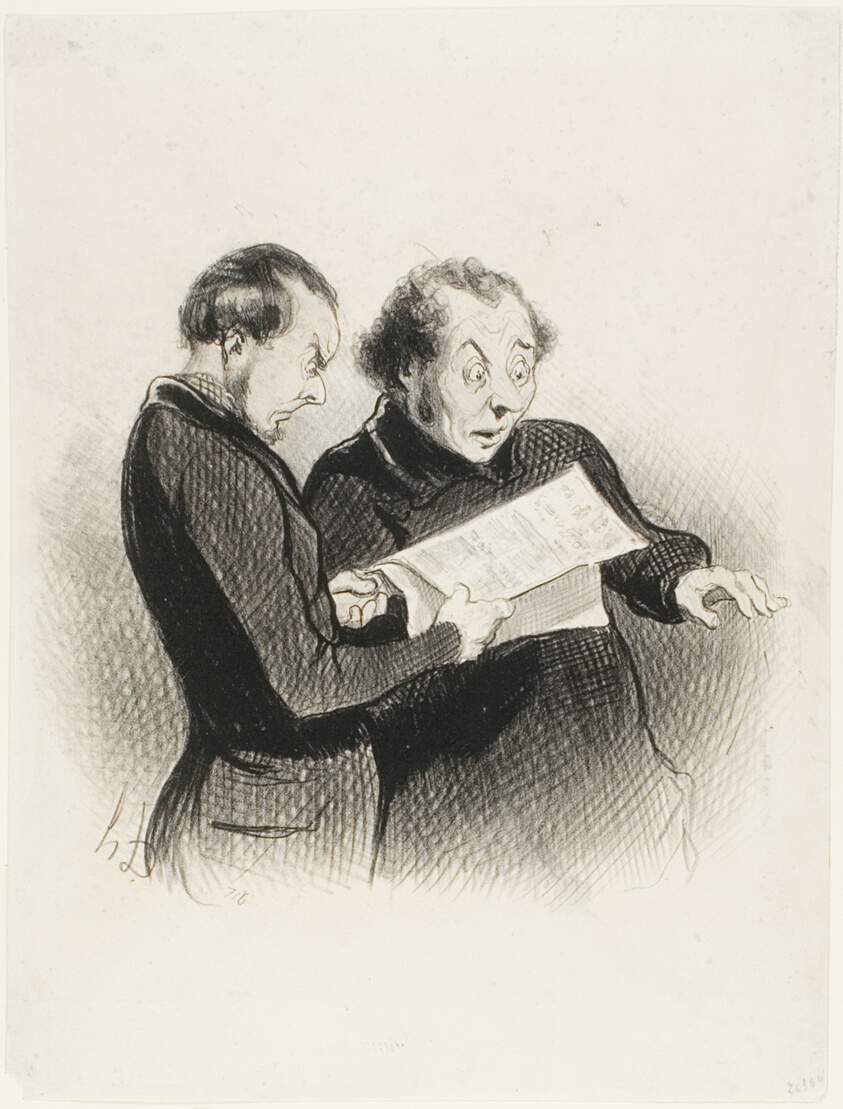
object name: Print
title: The Illustrated Rebus. “- Singular! I cannot guess the rebus in today's Charivari! - I think I have one word - I have several words - I have it all! I must run and tell my wife,” plate 39 from Les Beaux Jours De La Vie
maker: Honoré Victorin Daumier; French, 1808-1879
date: 1845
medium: Lithograph on ivory wove paper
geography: France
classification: lithograph; print; prints and drawing